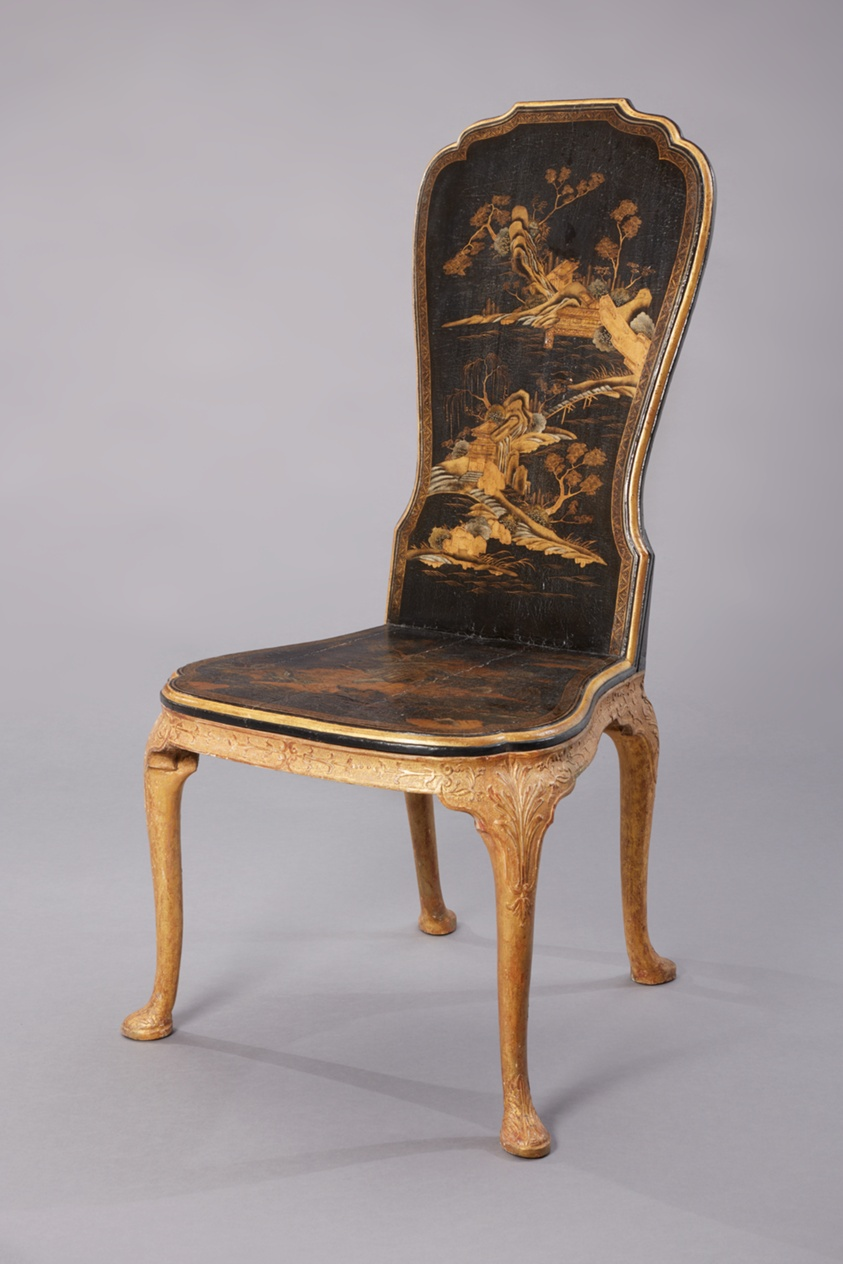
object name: Furniture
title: Pair of Hall Chairs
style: Baroque, chinoiserie, georgian, 18th Century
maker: China (lacquer back and seat panels) and England (frame)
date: 1720-30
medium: Frames: gilt gesso on beechwood; Backs and seats: lacquered and gilt Chinese softwood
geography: England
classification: chair; furniture; seating; european decorative arts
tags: landscapes, rocks